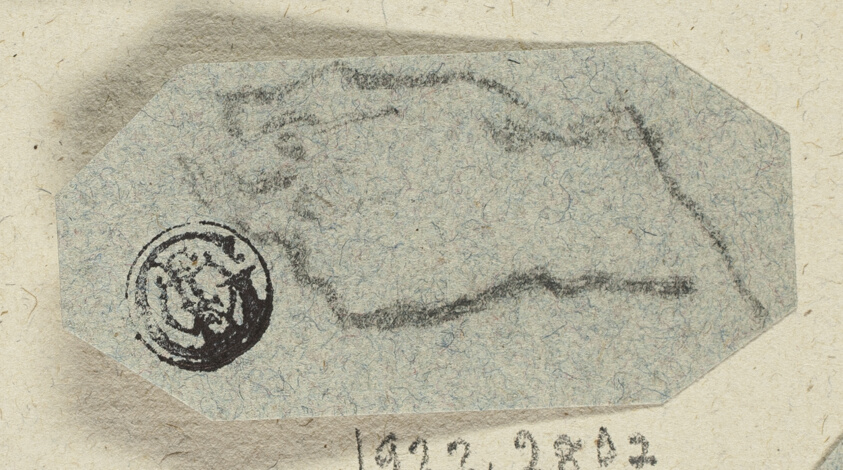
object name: Drawing and Watercolor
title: Left Hand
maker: Unknown Artist; British, 19th century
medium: Charcoal on blue laid paper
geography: United Kingdom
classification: chalk; drawings (visual works); prints and drawing; paper